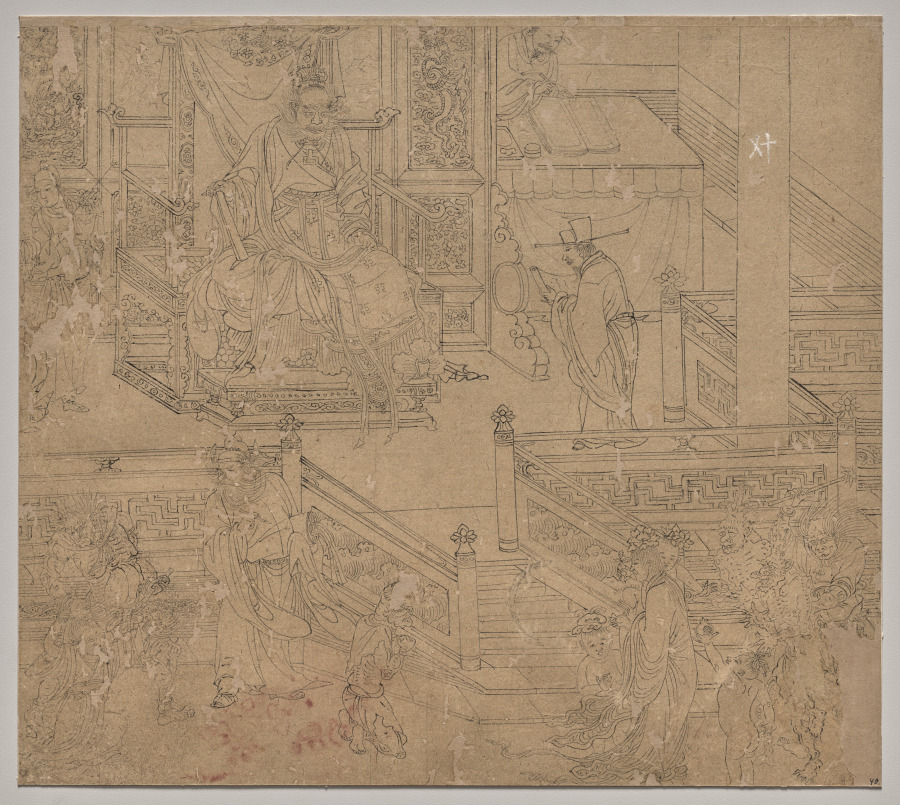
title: Album of Daoist and Buddhist Themes: Kings of Hells: Leaf 40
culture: China, Southern Song dynasty (1127-1279)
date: 1200s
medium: Album, ink on paper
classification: Painting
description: This extraordinary album has 50 paintings on a variety of religious subjects. They were likely created by several master craftsmen to share with studio apprentices as models for fulfilling commissions. The Jade Emperor and the Daoist pantheon make up the first 26 leaves. The next 14 leaves portray the Buddhist Ten Kings of Hell administering punishments to the dead. The third section, called “Clearing the Mountains,” features divine soldiers, led presumably by the deity Erlang Shen 二郎神, fighting undesirable creatures.